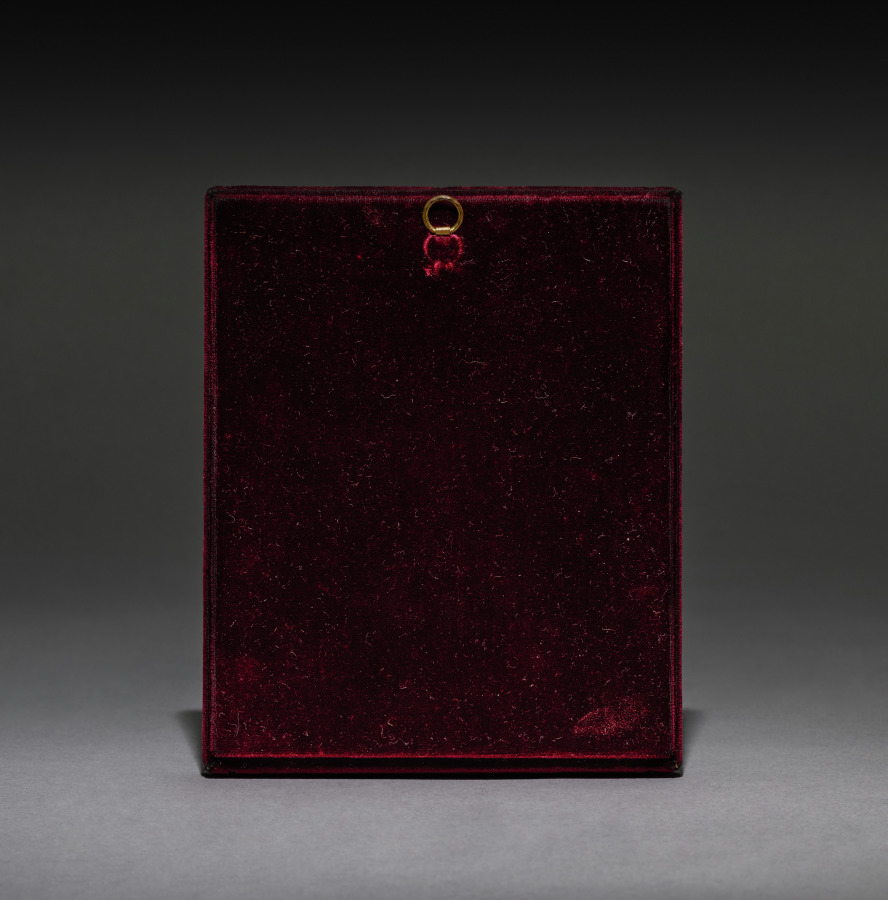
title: Portrait of Peter the Great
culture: Russia, Kholmogory School, 18th century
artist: Kholmogory School (Russian)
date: c. 1770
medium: ivory or bone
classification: Ivory